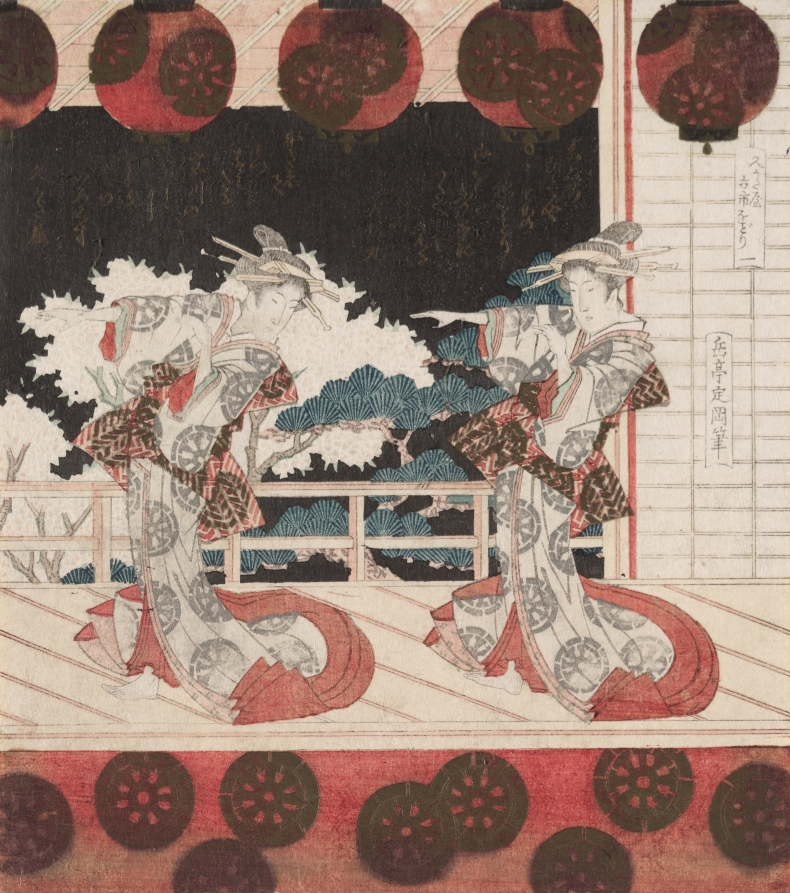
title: Furuichi Dance at the Hisagataya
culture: Japan, Edo period (1615–1868)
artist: Gakutei Harunobu (Japanese, 1786(?)–1868)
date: mid 1820s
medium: first of a pentaptych of woodblock prints; ink and color on paper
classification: Print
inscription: Signature: Gakutei Sadaoka hitsu